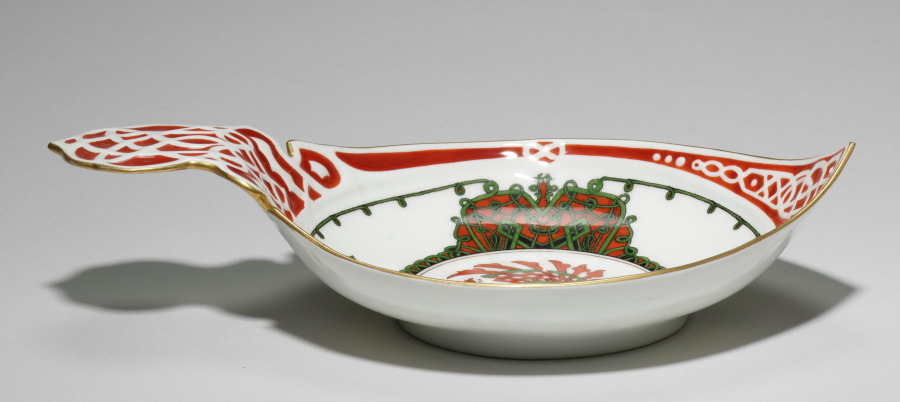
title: Cup (Kovsh)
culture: Russia, St. Petersburg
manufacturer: Kornilov Brothers (Russian, established 1835)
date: 1893–1917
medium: porcelain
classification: Ceramic